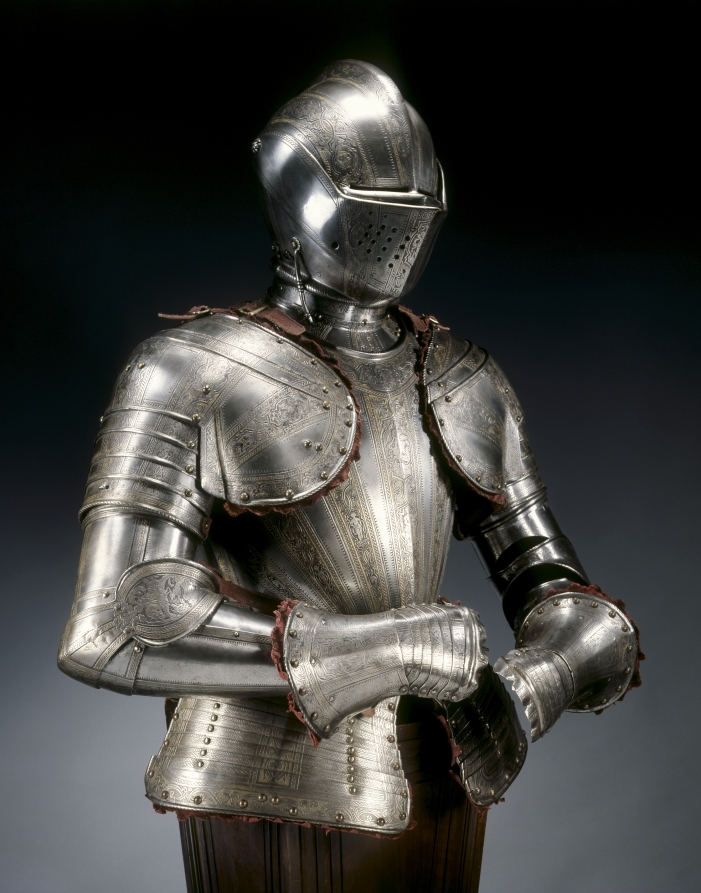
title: Half Armor for the Foot Tournament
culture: Italy, Milan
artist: Pompeo della Cesa (Italian, active 1572–93)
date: c. 1590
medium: etched and gilded steel, brass rivets, leather and velvet fittings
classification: Arms and Armor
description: This armor was designed for the foot tournament, an event that was separate from the equestrian jousts popularized during the Middle Ages and still favored among Renaissance aristocracies throughout Europe. Foot tournaments were commonly fought over a barrier that separated the combatants and gave protection to their legs, so a half-armor such as this one provided sufficient protection. The original owner of this suit would have worn it with colorful puffed and slashed britches and hose. The use of outlandish accessories, such as a large ostrich feather plume (a brass plume holder may be seen on the back of the helmet) and red velvet pickadils between the steel plates, provided additional splendor.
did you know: Pompeo della Cesa was the Armani or Gucci of the 1500s; everyone wanted to wear him.